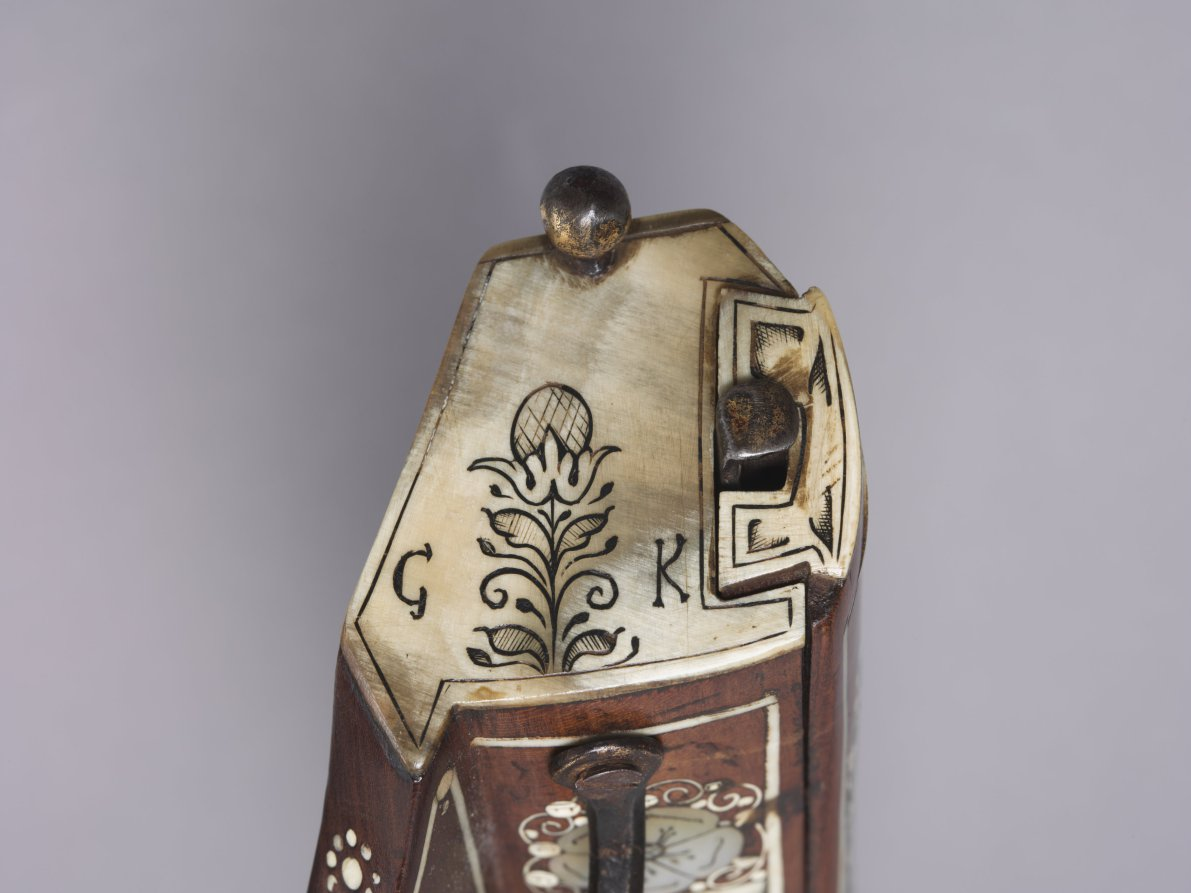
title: Wheel-lock Petronel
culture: Silesia (Southwestern Poland), Teschen, 17th century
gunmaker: Georg Kurland (Polish)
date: c. 1630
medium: steel, gilding, and wood inlaid with elk horn, ivory, and mother-of-pearl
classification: Arms and Armor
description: A petronel was a type of long pistol made with a wheel-lock ignition. Despite its length, the petronel was fired at the wrist like a pistol and not at the shoulder like a rifle. They were generally made in pairs during the early 1600s. Civilian versions were elaborately decorated for aristocratic clients.